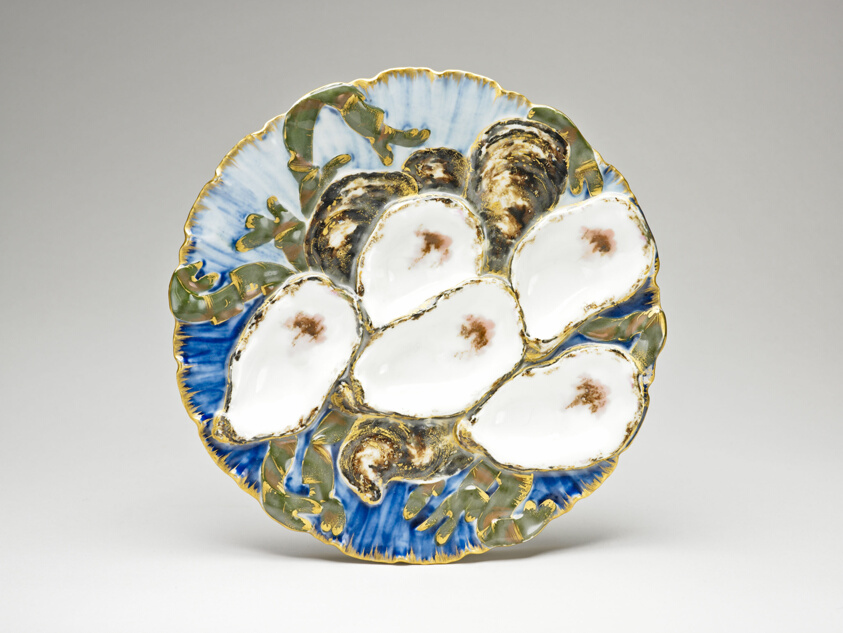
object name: Ceramics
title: Oyster Plate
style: gilded age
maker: Designed by Theodore Russell Davis (American, 1840–1894); Haviland & Co. (French, founded 1842); Limoges, France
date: Designed 1879; produced 1880–87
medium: Porcelain and enamel with gilding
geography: Limoges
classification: plate (general, dish); porcelain; american decorative arts; art of the americas; tableware; pottery; ceramics; decorative arts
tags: oysters, dining, tableware